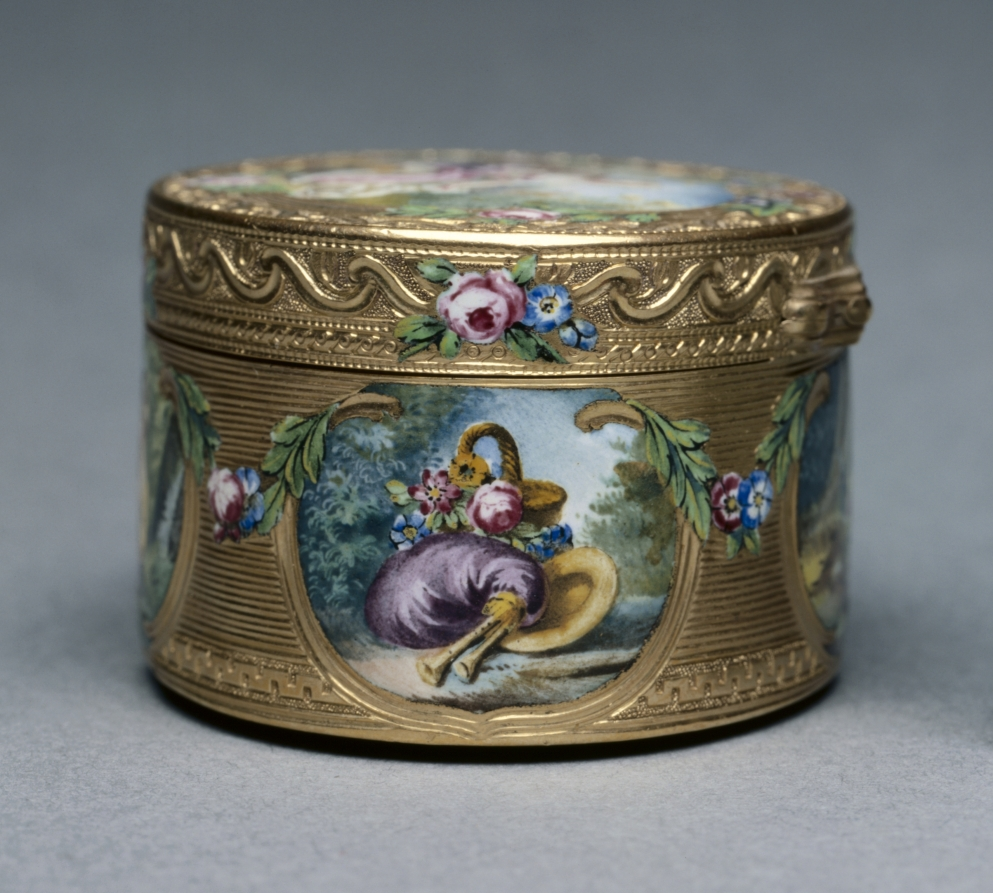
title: Snuff Box (Tabatière)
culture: France, 18th century (style of Louis XV)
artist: Francois Guillaume Tiron (French)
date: 1761–62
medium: gold and enamel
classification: Miscellaneous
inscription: [Maker's mark of Francois-Guillaume Tiron, master goldsmith in 1747, inside cover]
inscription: [Warden's mark, Paris, 1761-1762, inside cover]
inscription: [Charge mark of Eloi Brichard and Etienne Somfoye, Paris, 1756-1762, inside cover]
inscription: [Maker's mark of Francois-Guillaume Tiron, inside bottom]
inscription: [Warden's mark, 1761-1762, inside bottom]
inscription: [Charge mark of Brichard and Somfoye, inside bottom]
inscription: [Maker's mark of FG Tiron, left wall]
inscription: [Charge mark of Brichard and Somfoye, left wall]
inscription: [Warden's mark, Paris, 1761-1762, left wall]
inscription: [Discharge mark of J.J. Prevost, Paris, 1762-1768, bezel at right]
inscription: [Engraved number, maybe retailer's number]: "n. 13676"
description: The pastoral scenes that decorate this box are typical of the style of François Boucher, a celebrated painter of the period whose works were popularly reproduced on decorative arts. Snuff boxes, used practically as containers for powdered tobacco, were often decorated with miniature reproductions of notable works. The miniature on the cover is inspired by Boucher’s The Galant Pastor (Le Pasteur Gallant) (1738) and that on the bottom by The Amusement of the Shepherd Girl (L’Amusement de la Bergère) (1700s).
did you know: François Boucher was a favorite of the French royal court of Louis XV and named first painter of the king in 1765.